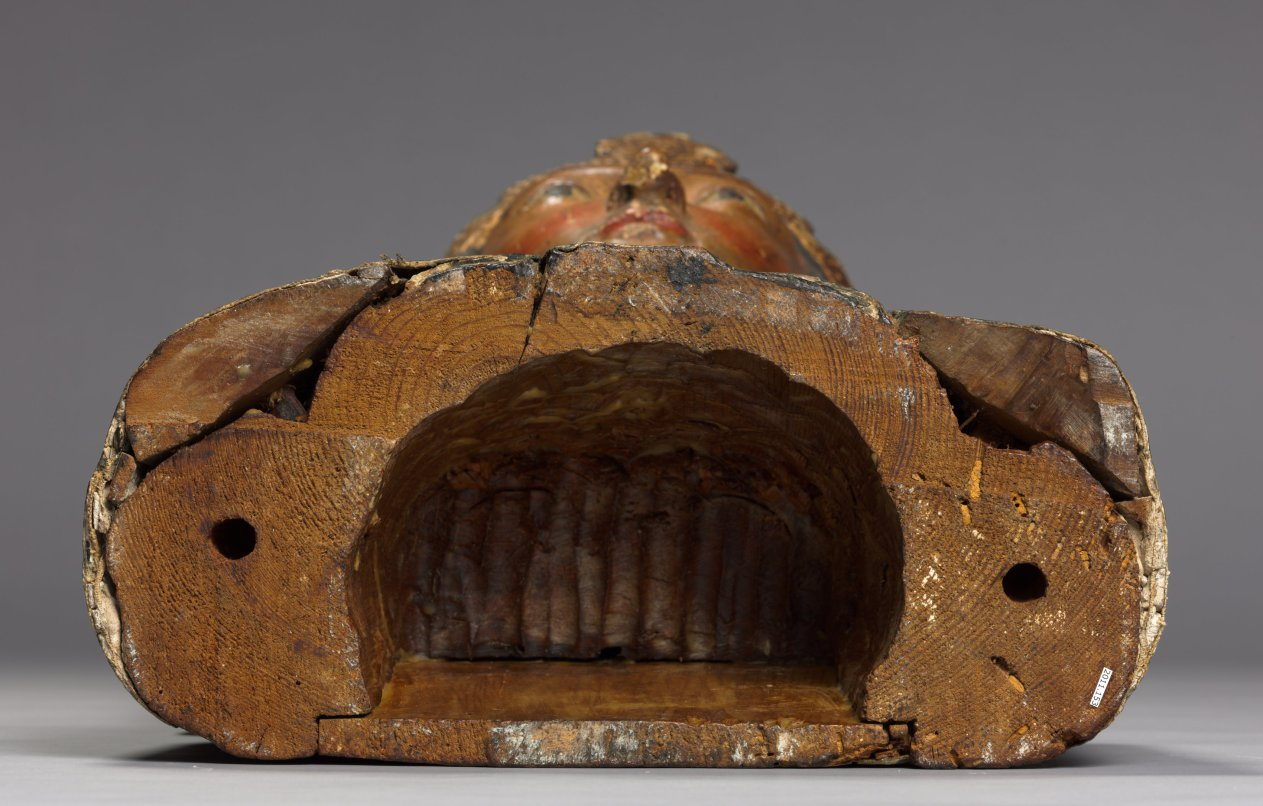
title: Bust Reliquary of St. Louis, Bishop of Toulouse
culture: Italy, Tuscany, Siena(?)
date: late 1300s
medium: wood (walnut) with polychromy, gesso and gilding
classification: Sculpture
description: This reliquary bust was probably made to house a relic of Saint Louis, Bishop of Toulouse (1274–97), second son of Charles II of Anjou, King of Naples (1288–1309). Renowned for his works of charity, he was made bishop in 1297 and died shortly after at the age of 23. He was canonized in 1317, and his cult of veneration spread rapidly in Italy and Spain. In art, Louis is generally represented as a "boy" bishop without a beard and with youthful features. The relic (now lost) would have been enshrined within. On feast days the reliquary would have likely been carried in procession and otherwise placed in a church sanctuary or on a side altar for the veneration of the faithful. Relics were the physical remains of the saints, chiefly their bodies. The living venerated the relics of the saints in order to seek their patronage, which in turn provided a proximate link to the divine ruler. The power of the saints was therefore manifested by and through their relics, or objects that were owned or touched by them. Medieval pilgrims, in a world fraught with peril, sought close physical contact with relics, which protected both the spiritual and temporal welfare of laypeople and religious communities.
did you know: This small bust was hewn out of wood, but painted realistically. Its life-like accuracy gave the medieval worshipper the sense that they were in the presence of the beloved bishop Saint Toulouse.